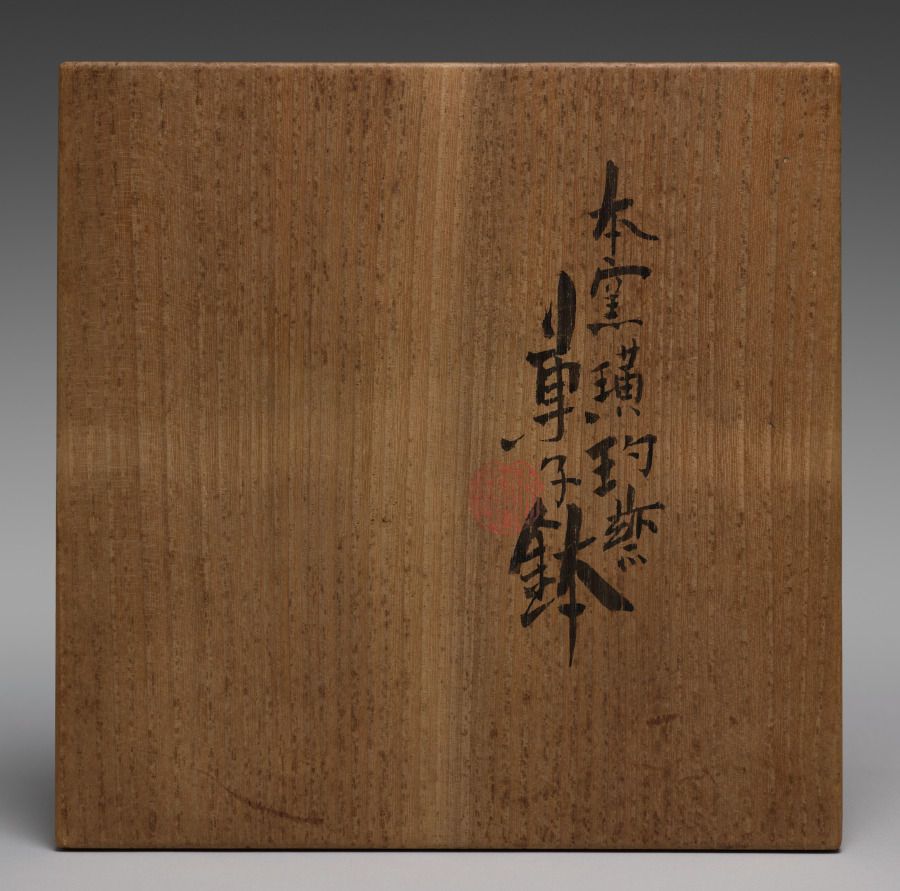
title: Sweets Bowl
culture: Japan, Meiji period (1868–1912)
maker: Seifū Yohei III (Japanese, 1851–1914)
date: 1893–1914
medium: Glazed porcelain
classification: Ceramic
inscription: 清風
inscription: 金聲玉振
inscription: 帝室技芸員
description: Seifū Yohei III was the most prominent head of a ceramics studio in Kyoto that specialized in Chinese-style porcelains and especially items for use in sencha (煎茶), or the drinking of steeped-leaf tea with companions. Sencha was popular among the bunjin of Kyoto and Osaka, who often enjoyed it as part of their emulation of Chinese culture. While sencha was by design less formal than the Japanese tea ceremony, it still featured the display of treasured objects. Prized Chinese antiquities were generally unobtainable, so substitutes such as the Gu-Shaped Flower Vase, CMA 2022.224, were much in demand. Bowls for distributing sweets, like this one, were also a staple of sencha gatherings.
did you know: Names for the glazes, written in ink with a brush on the lids of the custom-made storage boxes for the works, often indicate a specific glaze or ware that had inspired Seifū Yohei III.